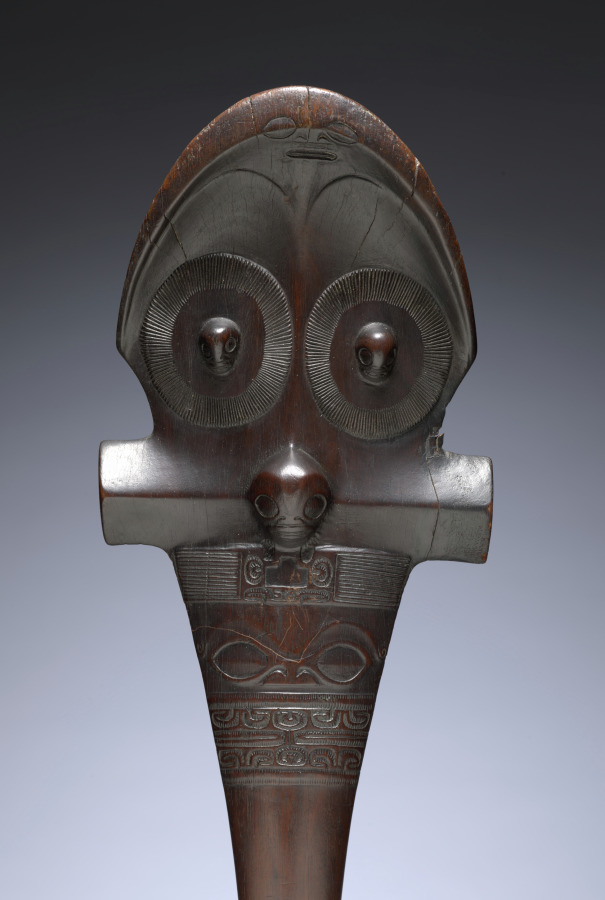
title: War Club ('U'u)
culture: Polynesia, Marquesas Islands, early 19th Century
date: early 1800s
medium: stained ironwood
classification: Sculpture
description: The head of this war club is carved as an abstract face, with small additional faces appearing at the eyes, nose, and forehead. Low-relief patterns encircle the club's neck. Fashioned from dense-grained ironwood (casuarina) or toa wood, the club is quite heavy. Like stilt footrests, war clubs were carved by expert artists (tahuna) and cured in the mud of a taro patch. The glossy finish is the result of regular rubbing and polishing with scented coconut oil. Similar war clubs were seen and recorded by the crew of Captain Cook's second voyage to the South Seas in 1772-75.